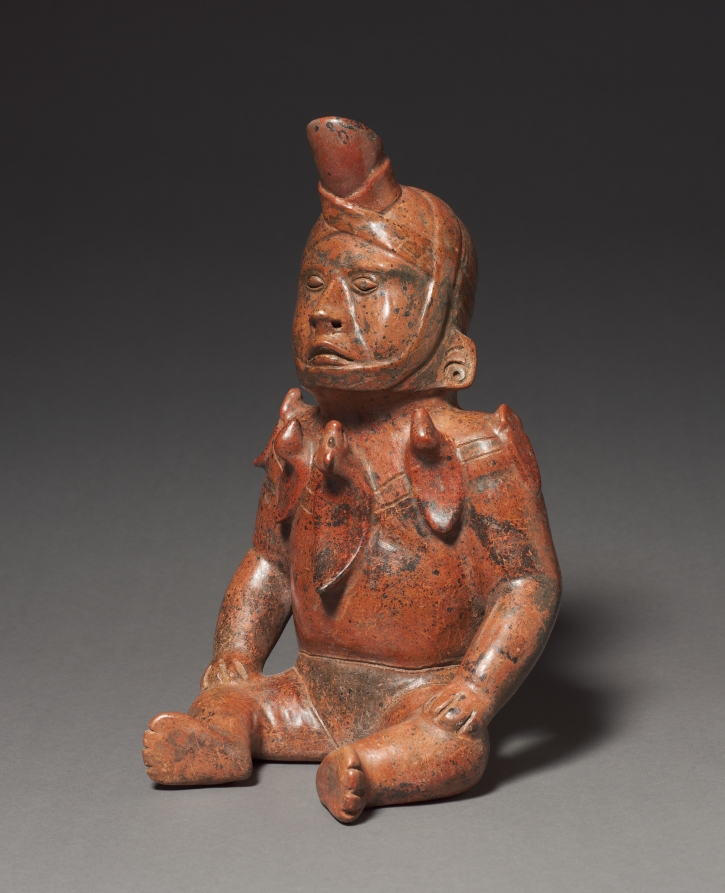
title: "Horned" Male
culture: West Mexico, Colima, Comala style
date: 100 BCE–300 CE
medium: earthenware with colored slips, black burial deposits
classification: Sculpture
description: This figure’s concentrated, otherworldly expression is emphasized by the hornlike element strapped to its forehead. This "horn" may be the spire of a conch shell, which comes from water and, therefore, refers to fertility—likely an important ritual concern of West Mexican chiefs. The element also could represent the "horn of power" worn in some areas of the world by shamans, the spiritual leaders and healers of small, nonindustrial societies.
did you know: This figure’s “horn” may be the spire of a conch shell, a reference to fertility.